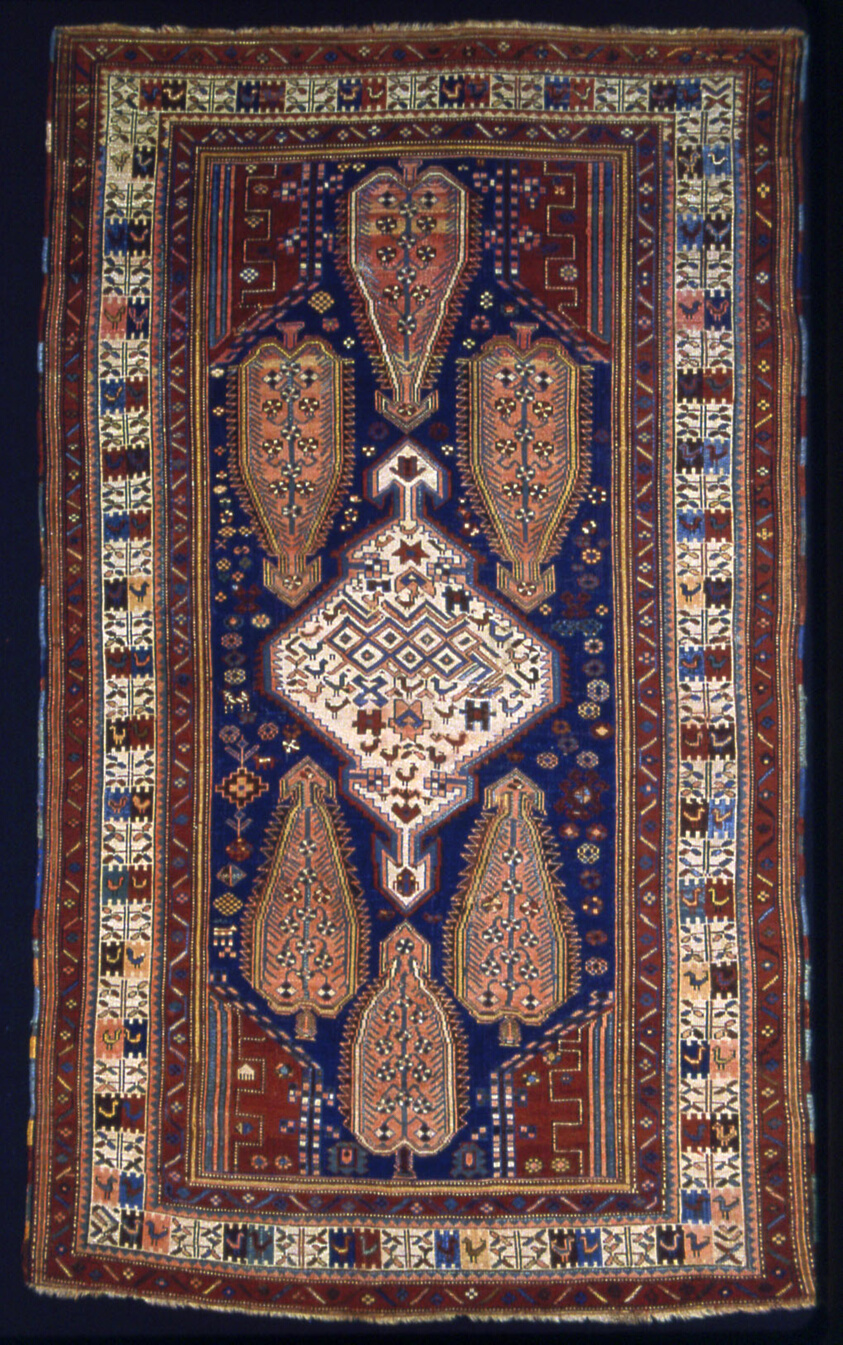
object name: Textile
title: Rug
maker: Caucasus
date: 1875/1900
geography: Caucasus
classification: textile; weaving - rug; weaving